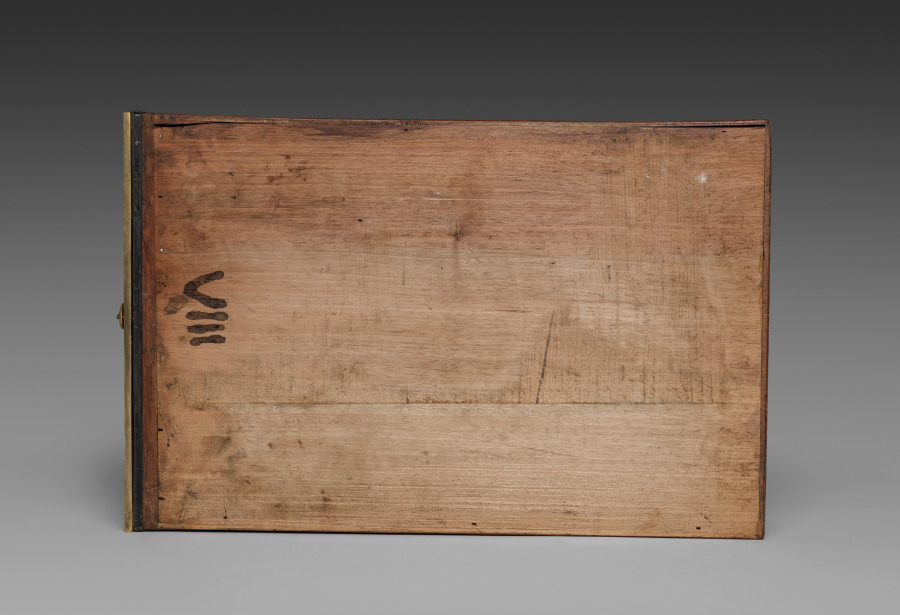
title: Side Drawer for Cabinet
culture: France, late 17th Century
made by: André-Charles Boulle (French, 1642–1732)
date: c. 1690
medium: ebony, marquetry in metal and tortoise shell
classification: Furniture and woodwork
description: Appointed cabinetmaker to King Louis XIV in 1672, André-Charles Boulle became a master of furniture making in France during the late 1600s until his death in 1732. Known primarily for his use of marquetry, in which metal patterns are inlaid into tortoiseshell then applied within the veneered surface of the furniture, Boulle established a level of quality and craftsmanship few others could achieve. As a result, his work found favor at the royal court and among other aristocrats and diplomats eager to impress the king. The inclusion of a medallion depicting Louis XIV within the bronze decoration of this chest would have identified the owner with the royal court. Often exhibiting stout architectural proportions with elegant groups of inlaid motifs such as the parrot on the central panel of this chest, Boulle’s designs are an example of the intellectual fashion for contrasting ideas, materials, and motifs.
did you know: Originally designed to sit atop an elaborate tall stand, this chest was likely altered in the late 1700s to reduce its scale and height.